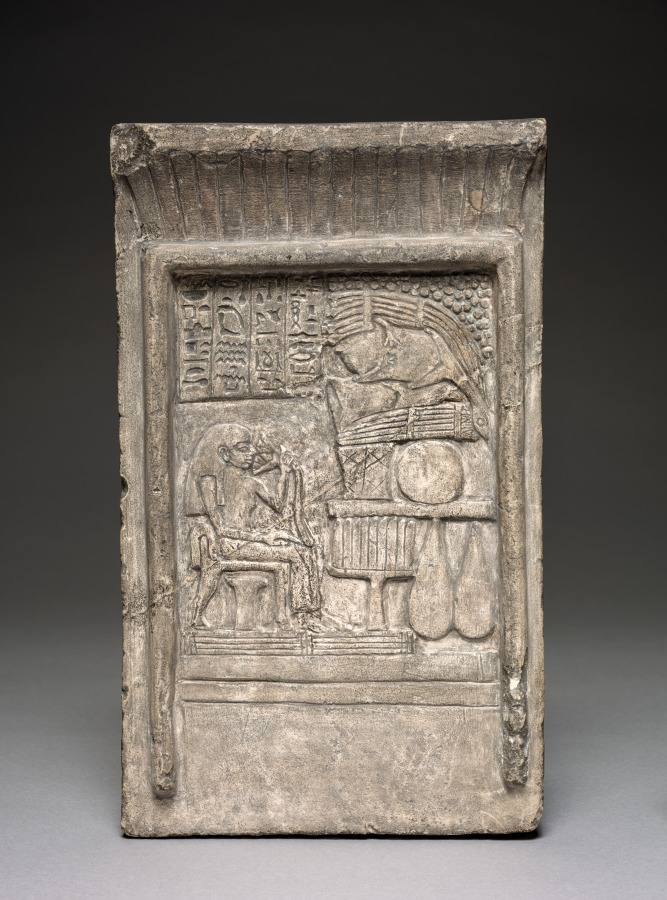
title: Stele of Hetpet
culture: Egypt, Middle Kingdom (2040–1648 BCE), Dynasty 12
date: 1980–1801 BCE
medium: limestone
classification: Sculpture